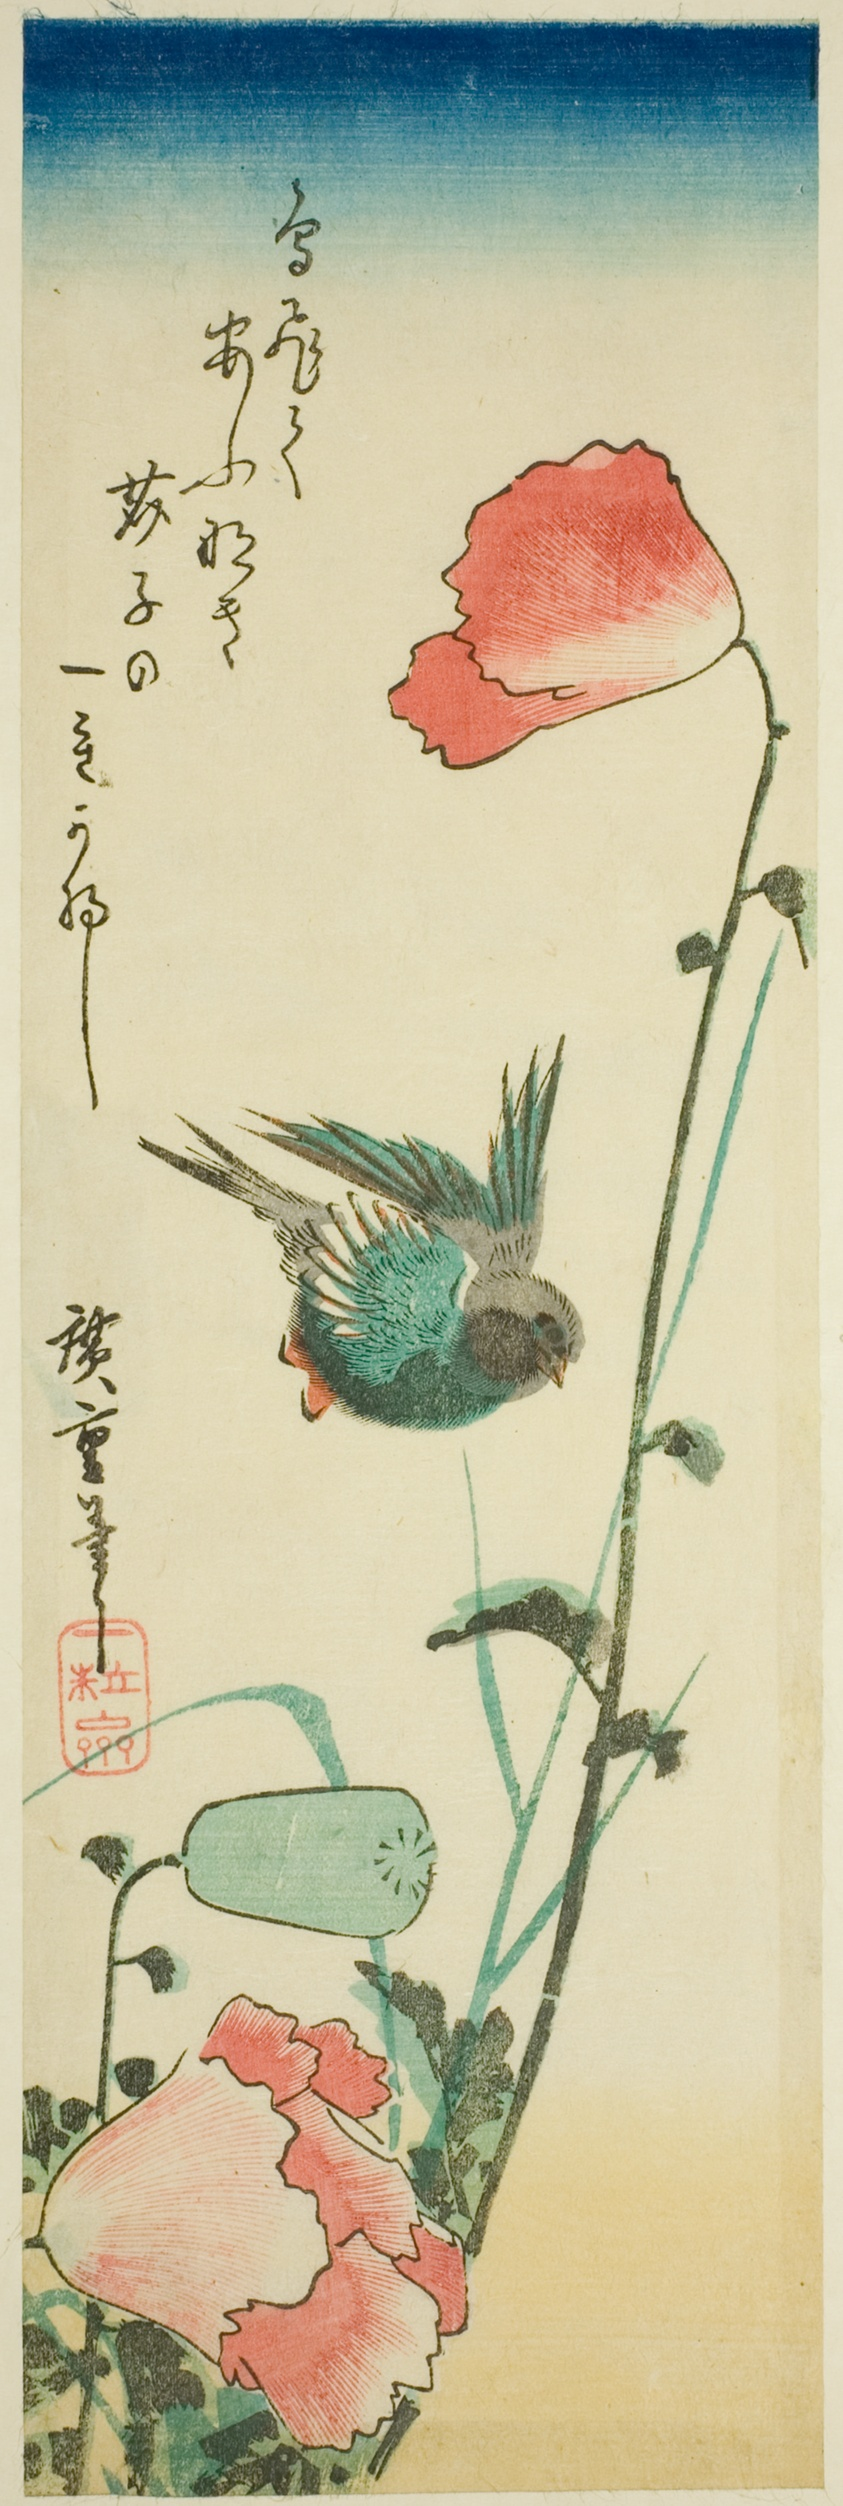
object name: Print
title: Swallow and poppies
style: Japanese (culture or style)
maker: Utagawa Hiroshige 歌川 広重; Japanese, 1797-1858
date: c. 1830s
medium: Color woodblock print; chutanzaku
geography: Japan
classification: woodblock print; print; asian art